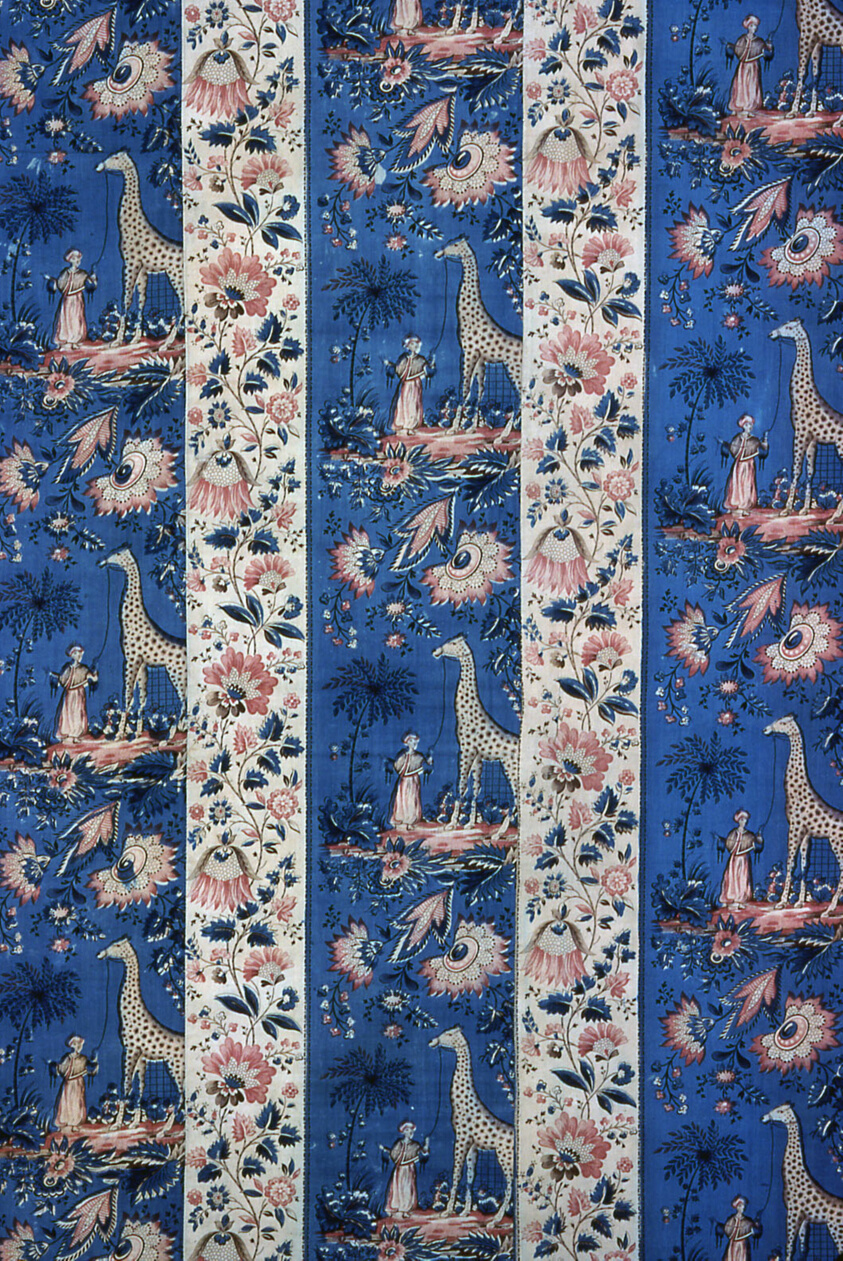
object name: Textile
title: Panel (Furnishing Fabric)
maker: England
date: 1800/50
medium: Cotton, plain weave; printed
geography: England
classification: textile; weaving - printed; weaving; furnishing textile